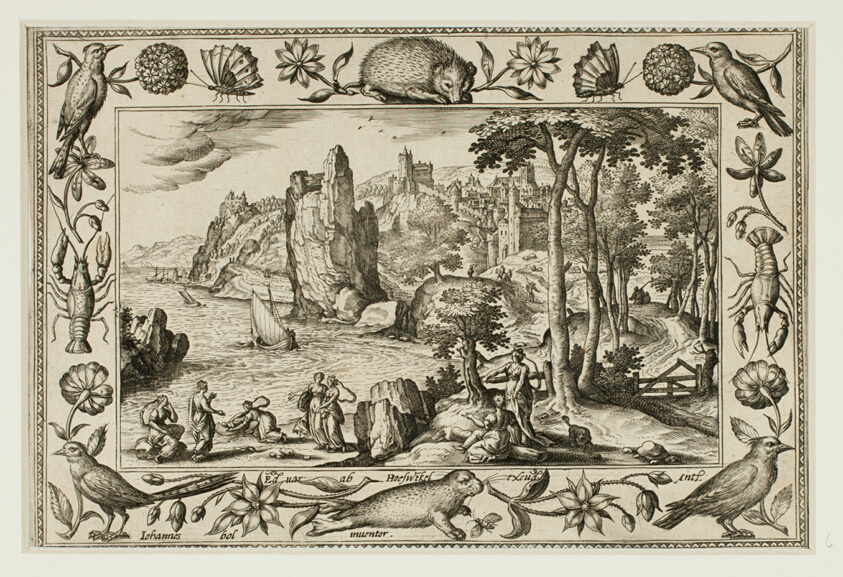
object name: Print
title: Pharaoh's Daughter Finding Moses, from Landscapes with Old and New Testament Scenes and Hunting Scenes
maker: Adriaen Collaert (Flemish, c. 1560–1618); after Hans Bol (Flemish, 1535–1593); published by Anna van Hoeswinckel (Flemish)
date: 1584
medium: Engraving in black on cream laid paper, laid down on cream laid paper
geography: Flanders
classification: engraving; paper; print; prints and drawing